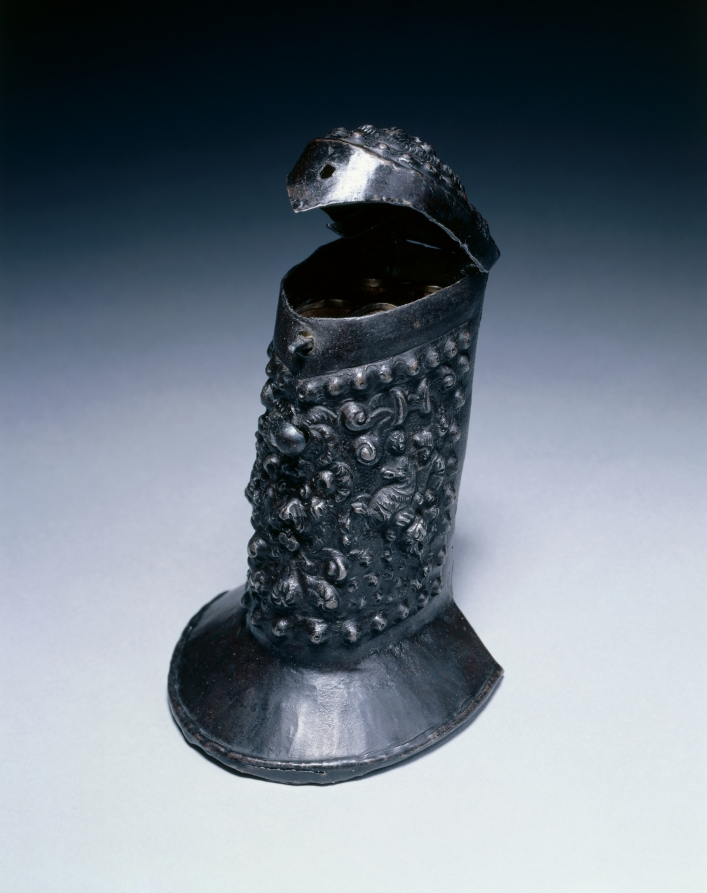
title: Patron (Cartridge Box)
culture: Germany, early 17th Century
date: c. 1600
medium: steel sheet, over wood, brass; leather base; embossed decorations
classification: Arms and Armor